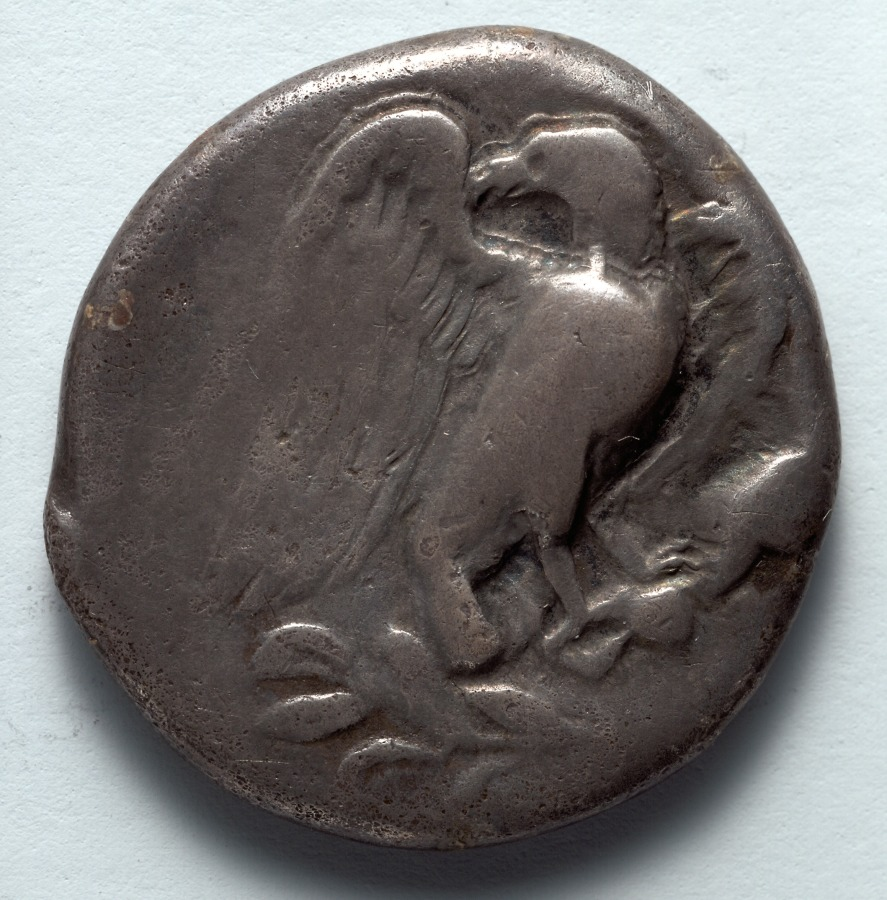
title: Stater: Eagle (obverse); Thunderbolt (reverse)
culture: Greek, minted in Elis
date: c. 432–421 BCE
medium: silver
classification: Coins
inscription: Ϝ | Α